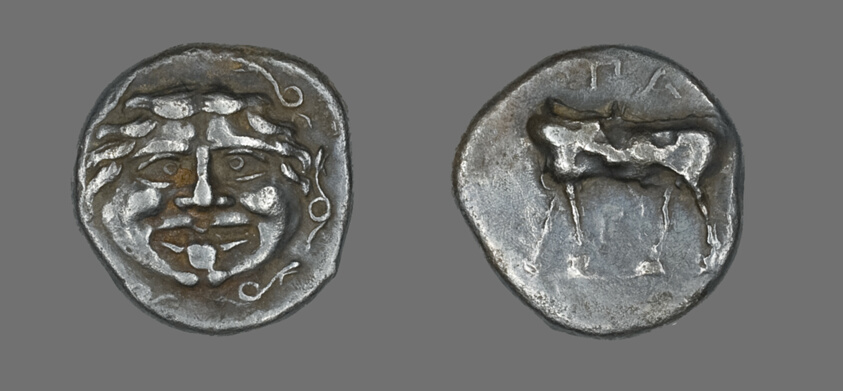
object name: Coin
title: Hemidrachm (Coin) Depicting a Bull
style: greek, ancient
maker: Greek, minted in Parium, Mysia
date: about 400 BCE and later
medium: Silver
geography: Ancient Greece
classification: coin; ancient art